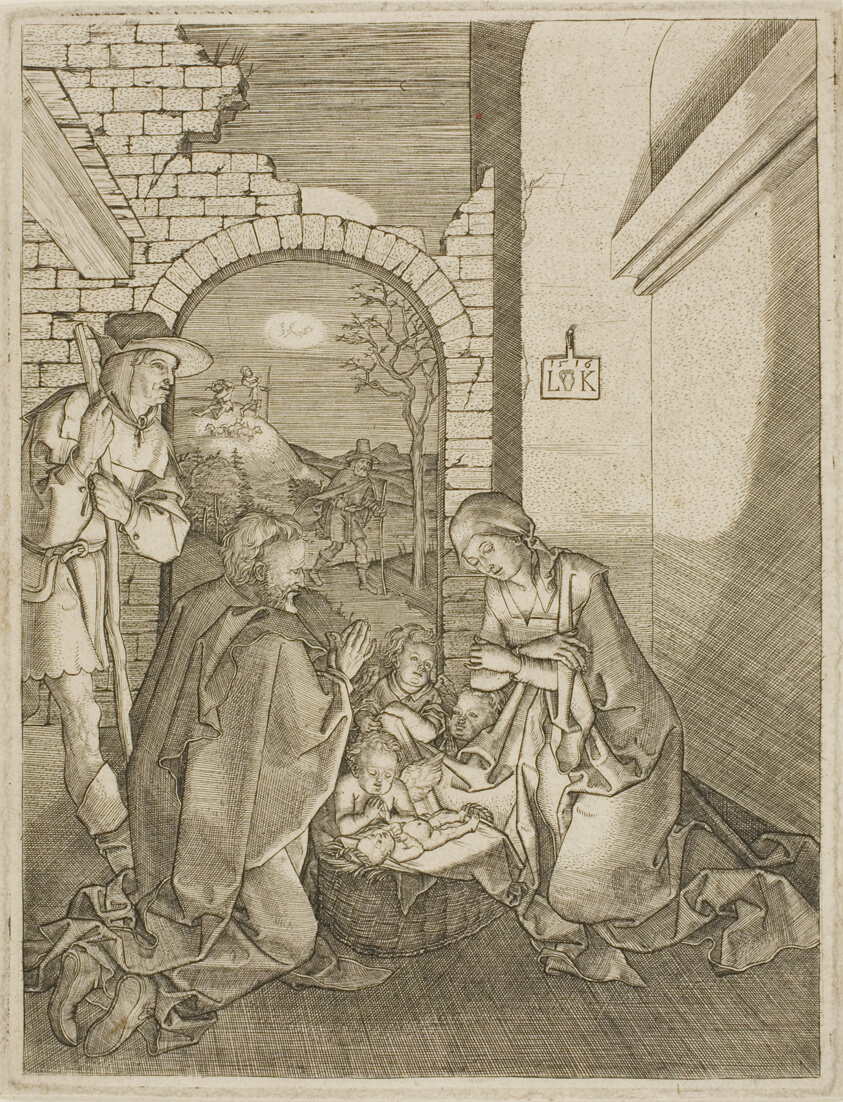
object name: Print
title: Nativity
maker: Ludwig Krug (German, 1449/50-1535)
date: 1516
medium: Engraving in black on ivory laid paper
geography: Germany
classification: engraving; print; prints and drawing